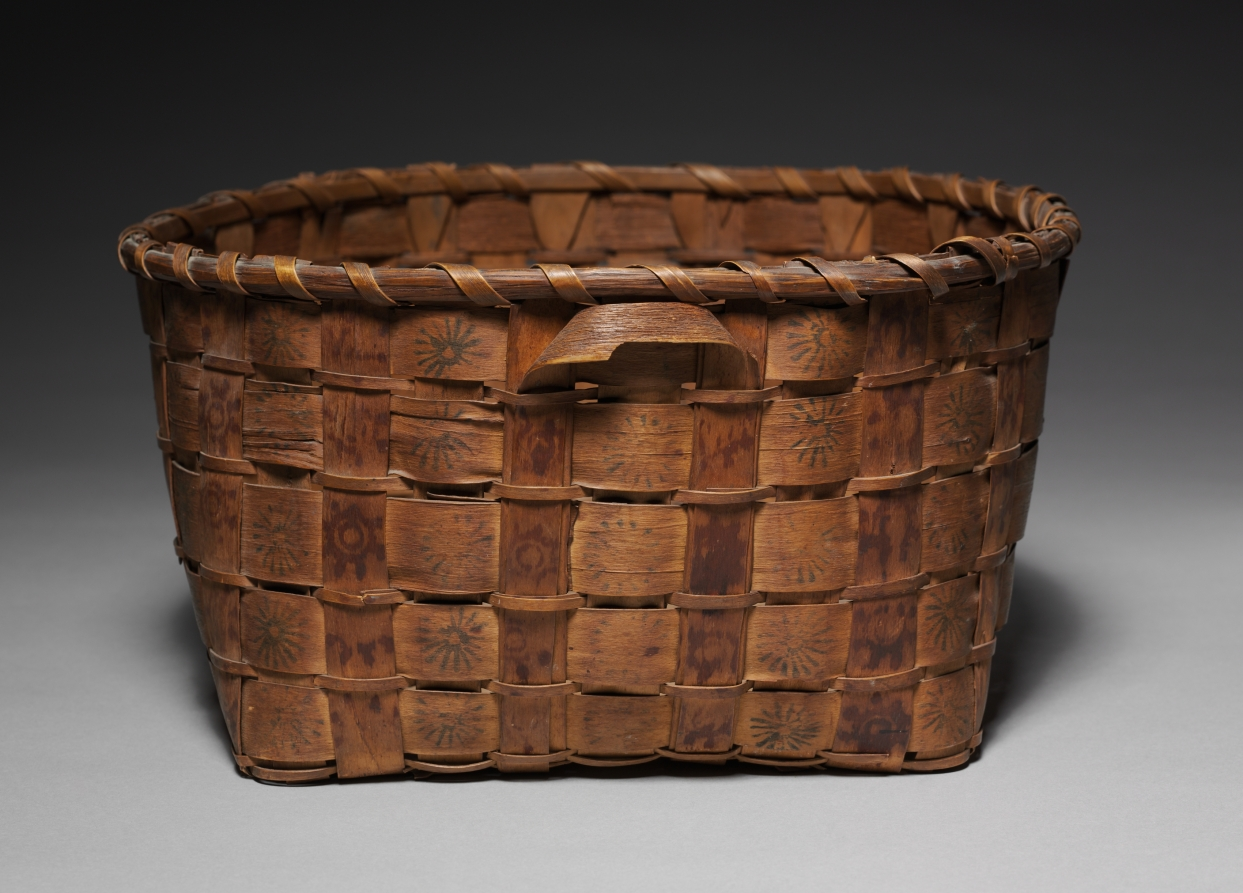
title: Basket with Stamped Decoration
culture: Native North America, Woodlands, Algonquian or Haudenosaunee (Iroquois), Post-contact Period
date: early 1800s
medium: ash? strips, pigment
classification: Basketry